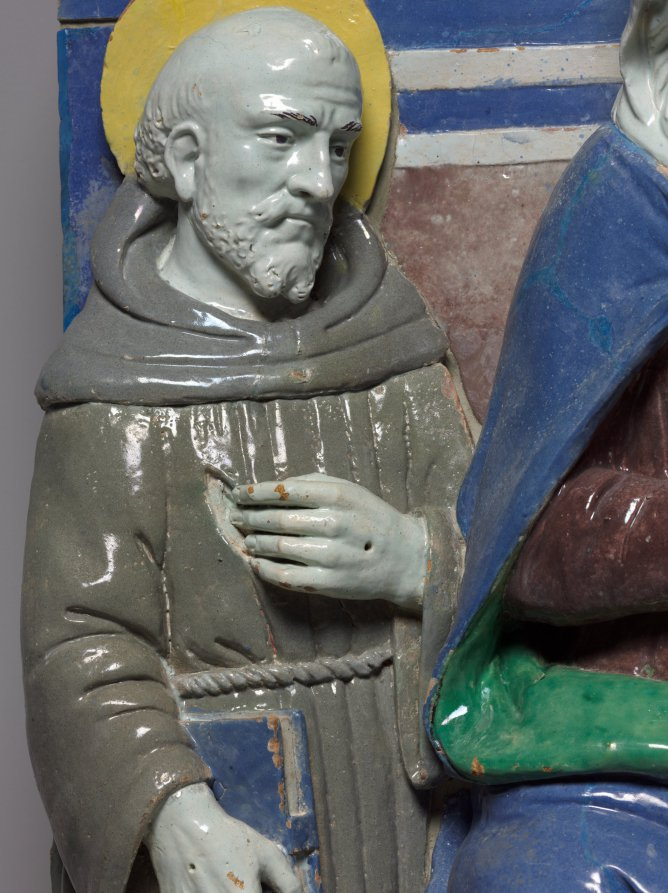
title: Virgin and Child Enthroned with Saints Francis and Giovanni Gualberto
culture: Italy, Florence, 16th century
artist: Benedetto Buglioni (Italian, 1461–1521)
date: c. 1510–20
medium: glazed terracotta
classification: Sculpture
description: The Madonna sits upon a throne with the Christ child standing on her knee. He is steadied by his mother, turning delicately to grasp her robe for support. On the left is Saint Francis, identified by his stigmata. On the right, Saint Giovanni Gualberto is identified by his monk's robe and distinctive processional cross. The brown robes of the saints, the purple of the Virgin's tunic, and the flesh tones of the figures contrast strongly against the bright blue background. In the semicircular sky behind the figures, three winged cherub heads emerge, representing a host of angels. Glazed terracotta is both durable and decorative and the gleaming white of this piece would have stood out in the darkness of a church. The medium was made popular by Renaissance artist Luca della Robbia and came into fashion as a substitute for expensive carved marble. A rounded arch frame embellished with fruit and flower garlands as well as egg-and-dart and cord moldings accompanied the work when it was acquired, but was later determined not to be original and removed. Buglioni's work bears the influence of the della Robbias, particularly in the simple color scheme. Buglioni likely worked in the studio of Luca's nephew, Andrea, where he would have learned the technique of glazing terracotta.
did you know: The unusual purple hue is particular to the artist.